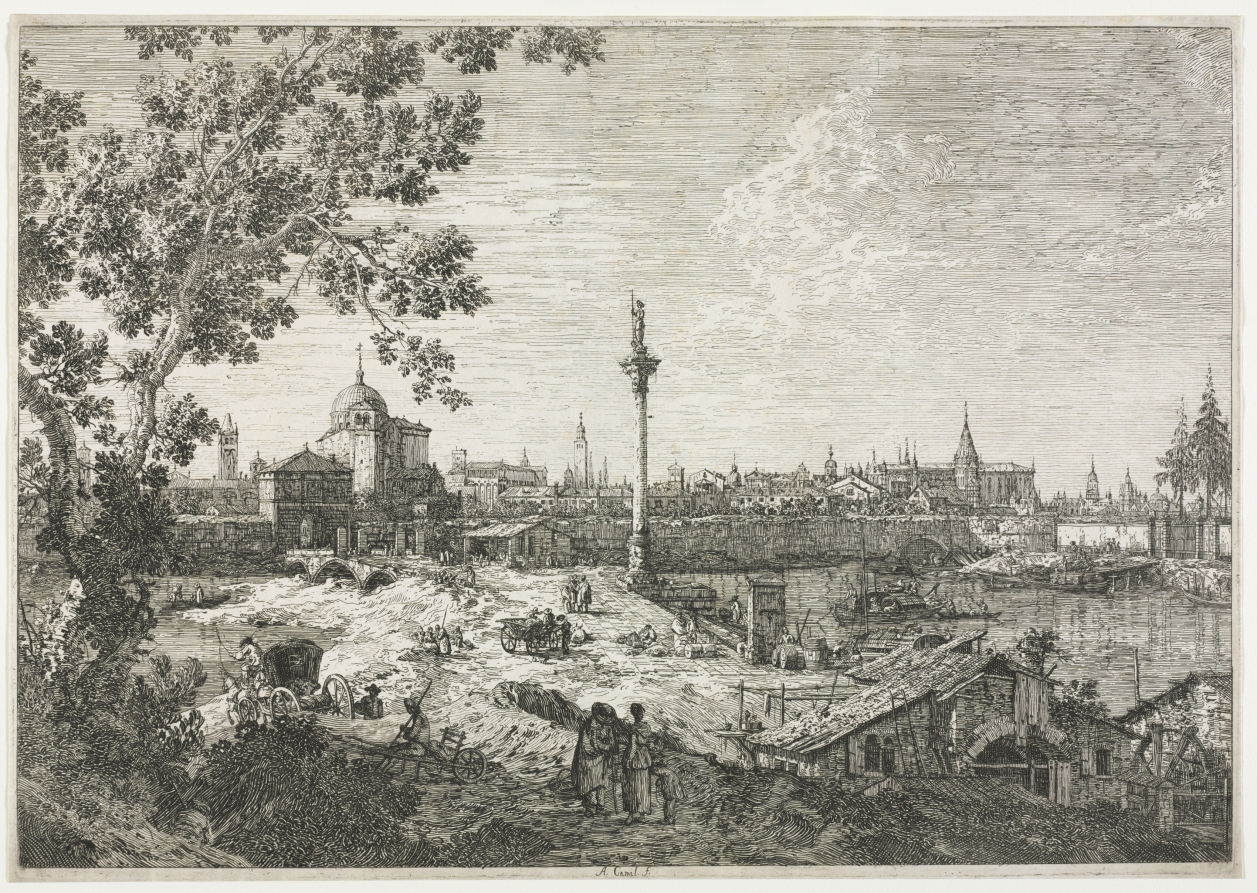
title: Panorama of a City on a River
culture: Italy, 18th century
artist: Antonio Canaletto (Italian, 1697–1768)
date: c. mid-1700s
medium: etching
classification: Print